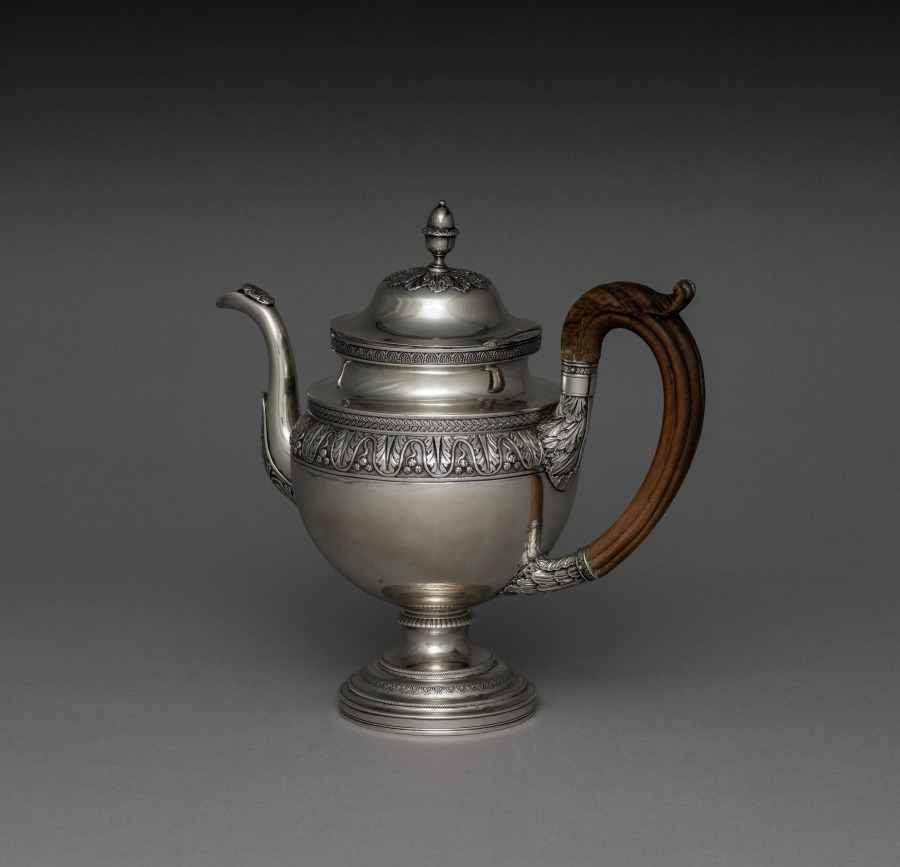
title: Covered Pot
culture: America, Pennsylvania, Philadelphia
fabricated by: after a design by Harvey Lewis (American, 1835)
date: c. 1811–25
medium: silver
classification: Silver